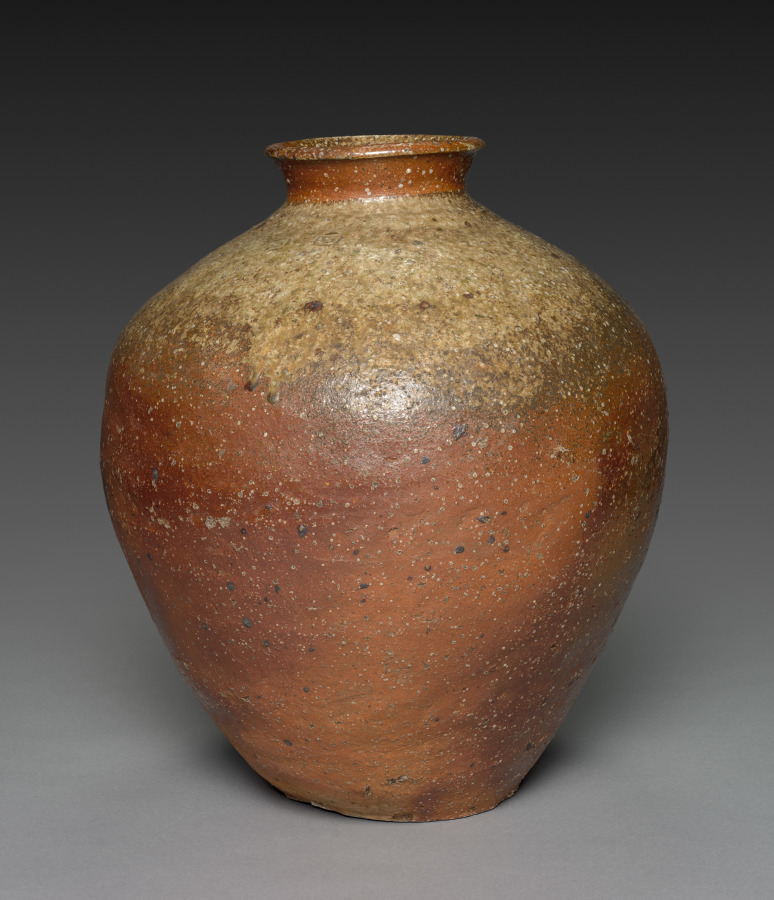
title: Storage Jar (Tsubo)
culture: Japan, Muromachi period (1392–1573)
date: late 1400s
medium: Stoneware with natural ash glaze (Shigaraki ware)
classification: Ceramic